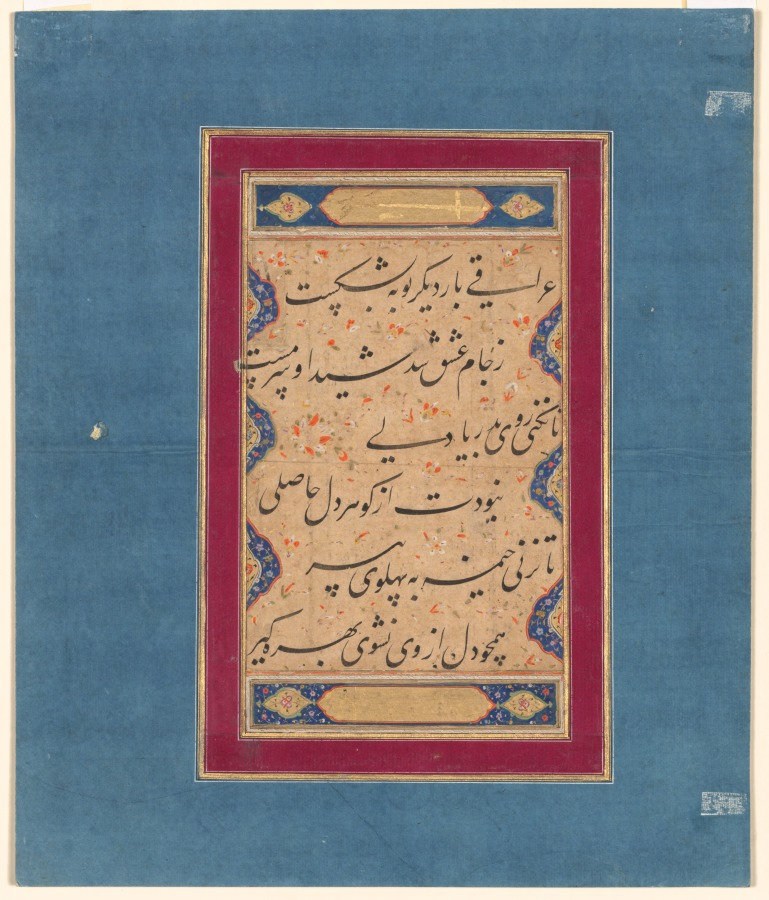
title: Calligraphy from a ghazal of Fakhr al-Din Iraqi (Persian, 1213–1289) and a verse from the Tuhfat al-ahrar (The Gift of the Free) of Abd al-Rahman Jami (verso)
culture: India, Mughal, 18th century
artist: attributed to Muhammad Rizavi Hindi (Indian, active mid-1700s)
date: c. 1760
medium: Gum tempera, ink, and gold on paper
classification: Calligraphy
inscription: verso: Illuminated panel of Persian poetry in nast'aliq calligraphy. Two poems: a ghazal of ‘Iraqi (Persian, 1213–1289) and an anonymous mystical verse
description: The first two lines in Persian read: Once again, Iraqi broke his vows: From the cup of love he became intoxicated and ecstatic. The excerpt from the mystic poet Jami is more of a pious injunction: Until you are bold enough to take to the seas, You will not reap spiritual benefits from your inner heart. Unless you pitch your tent next to the spiritual guide, You will not enjoy him to the fullest.